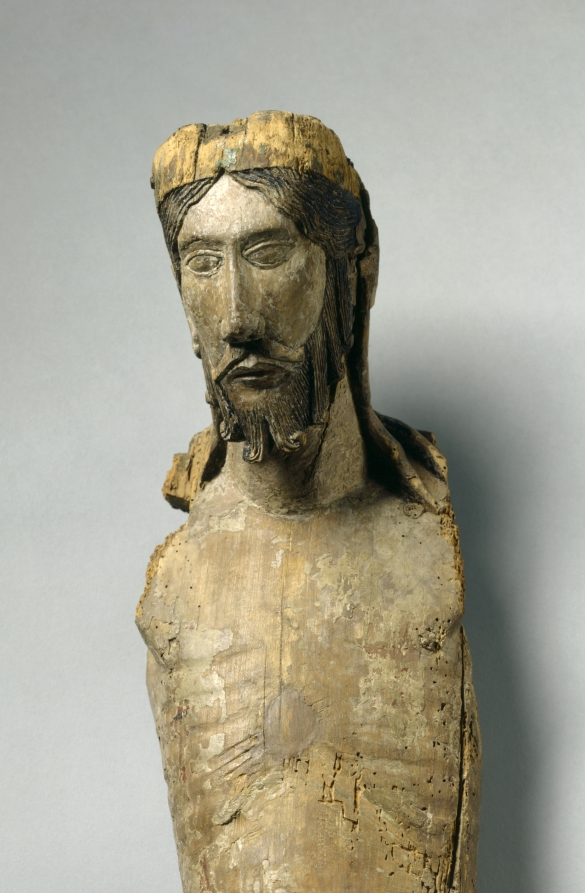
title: Corpus from a Crucifix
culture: France, Burgundy, Autun?, 12th century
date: c. 1130–1140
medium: polychromed wood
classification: Sculpture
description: By the 11th century, monumental crucifixes carved from wood and painted were a common feature of church interiors. Placed on or suspended above the main altar, they reminded viewers of Christ’s sacrifice on behalf of mankind at the Crucifixion, an event reenacted every time Mass was celebrated on the altar below. Crucifixes also invited prayer and meditation on Christ’s role as Redeemer. This fragmentary but finely carved corpus, or body of Christ, once belonged to such a crucifix.